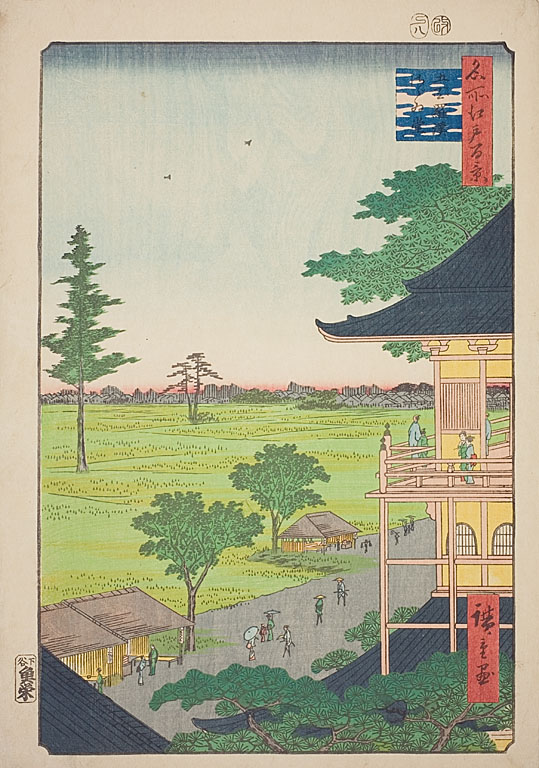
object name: Print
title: Sazai Hall of the Five Hundred Rakan Temple (Gohyaku Rakan Sazaido), No.66 from the series "One Hundred Famous Views of Edo (Meisho Edo hyakkei)"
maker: Utagawa Hiroshige (Japanese, 1797-1858)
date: 1857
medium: Color woodblock print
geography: Japan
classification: woodblock print; print; asian art